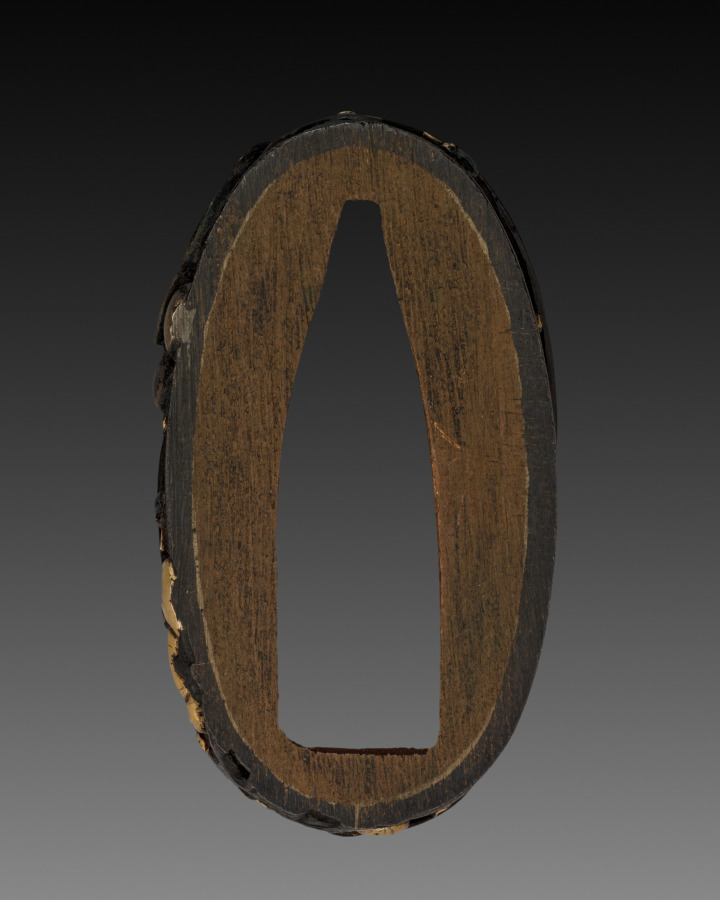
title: Sword-Hilt Collar (Fuchi)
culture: Japan, Edo period (1615–1868)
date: 1700–1850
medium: shakudo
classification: Arms and Armor